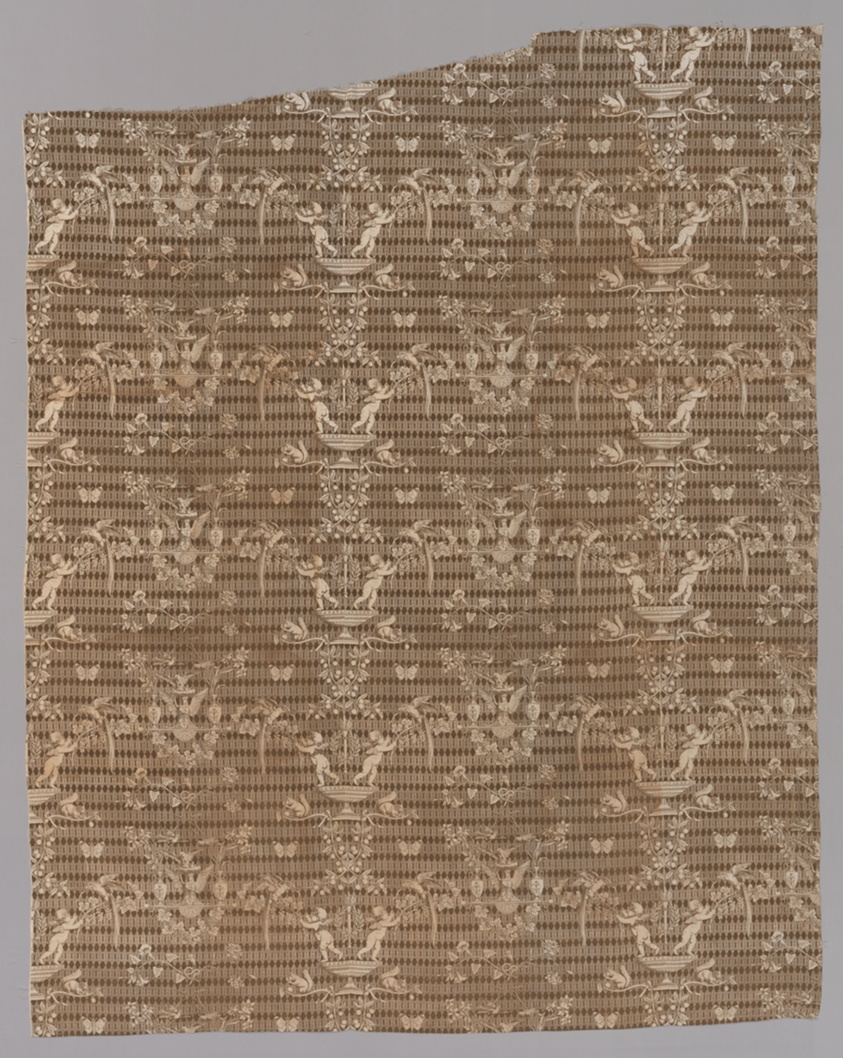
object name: Textile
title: “Birds and Squirrels” Furnishing Fabric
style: Neoclassicism, jouy-en-Josas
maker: Designed by Jean Baptiste Huet (French, 1745–1811); France, Jouy-en-Josas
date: 1806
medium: Cotton; roller printed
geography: France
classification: printed textile; textile; furnishing textile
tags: birds, animals